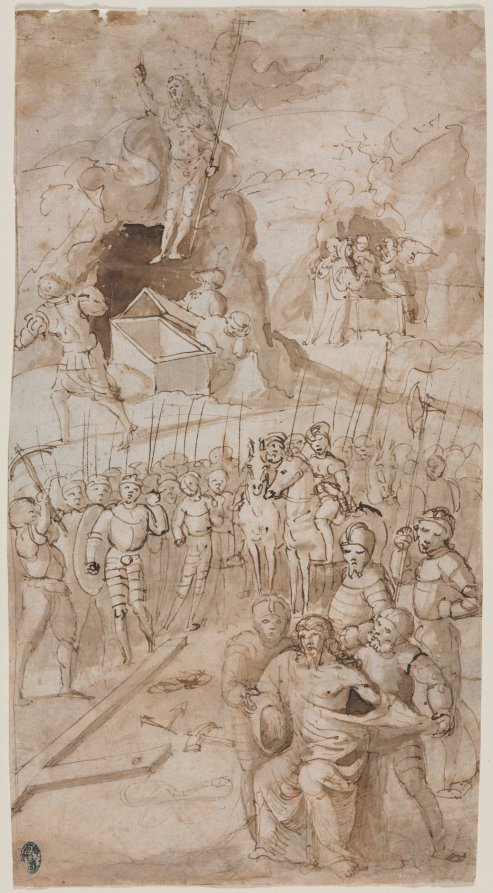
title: Three Scenes from the Passion of Christ (recto)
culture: Northern Italy, 16th century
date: 1500s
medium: pen and brown ink and brush and brown wash over traces of black chalk; framing line (left edge) in brown ink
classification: Drawing